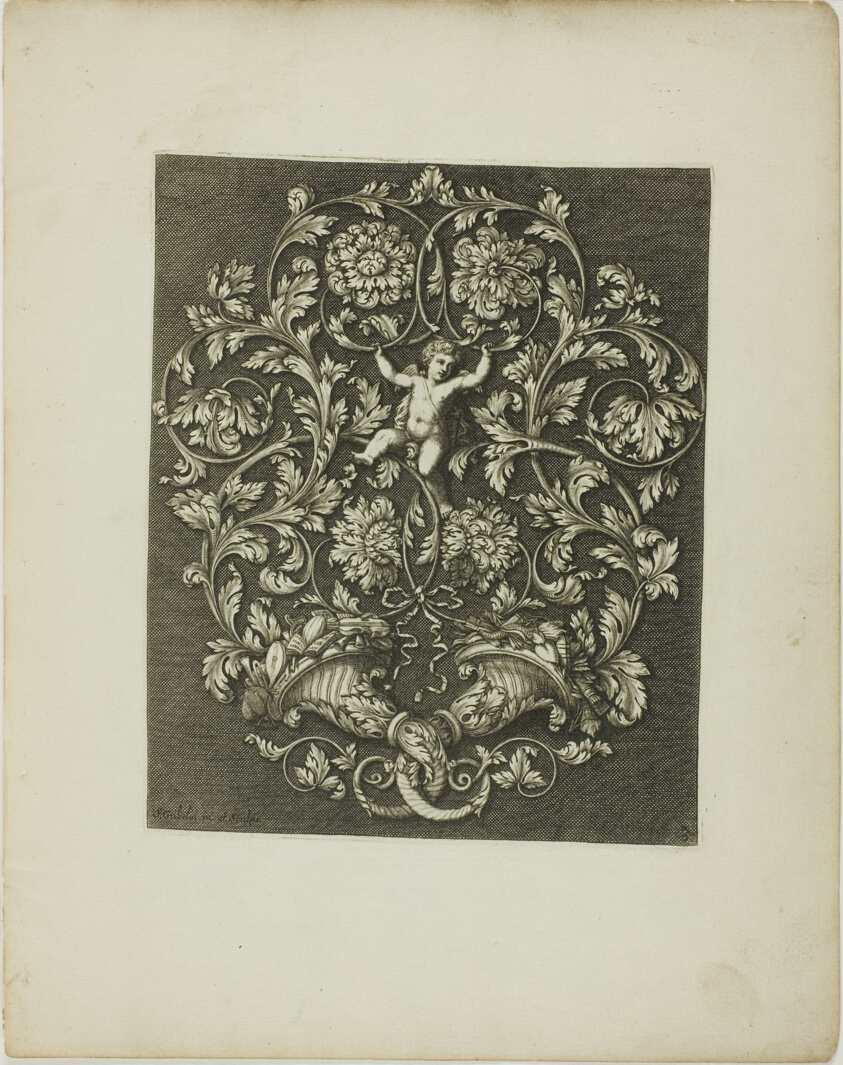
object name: Print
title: Plate Three, from A New Book of Ornaments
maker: Simon Gribelin II; French, 1661-1733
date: 1704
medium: Engraving on paper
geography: France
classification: engraving; print; prints and drawing